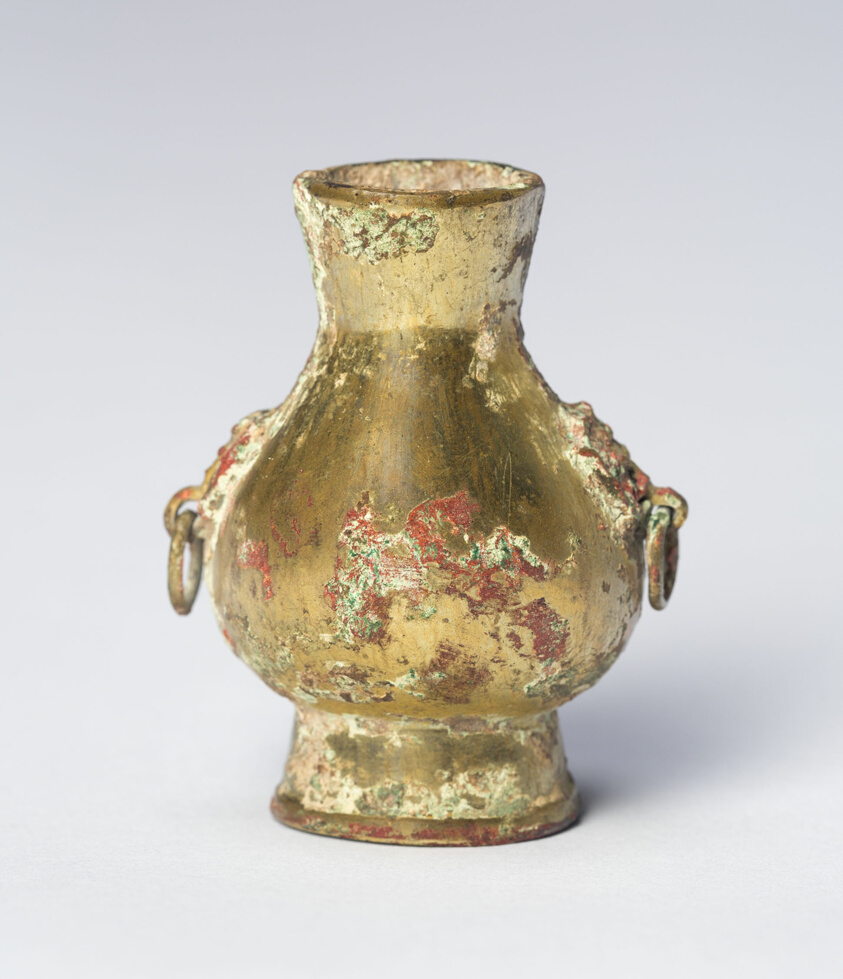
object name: Vessel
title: Miniature Wine Jar (Hu)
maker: China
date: Han dynasty (206 BCE - 220 CE)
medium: Gilt bronze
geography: China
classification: bronze; metal; decorative object/ornament; asian art; vessel